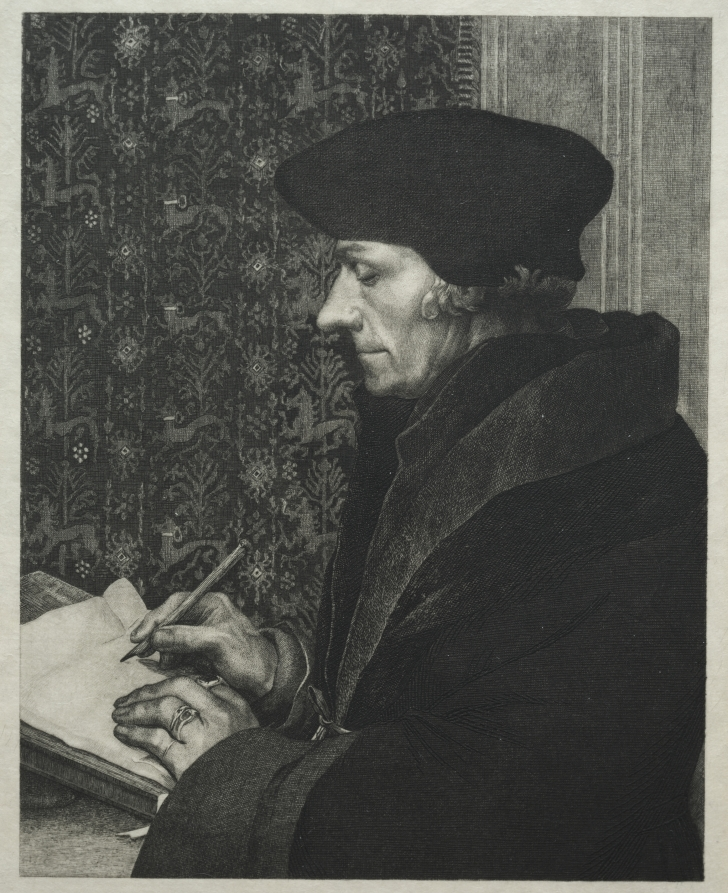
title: Erasmus, after Holbein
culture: France, 19th century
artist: Félix Bracquemond (French, 1833–1914)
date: 1863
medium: etching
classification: Print